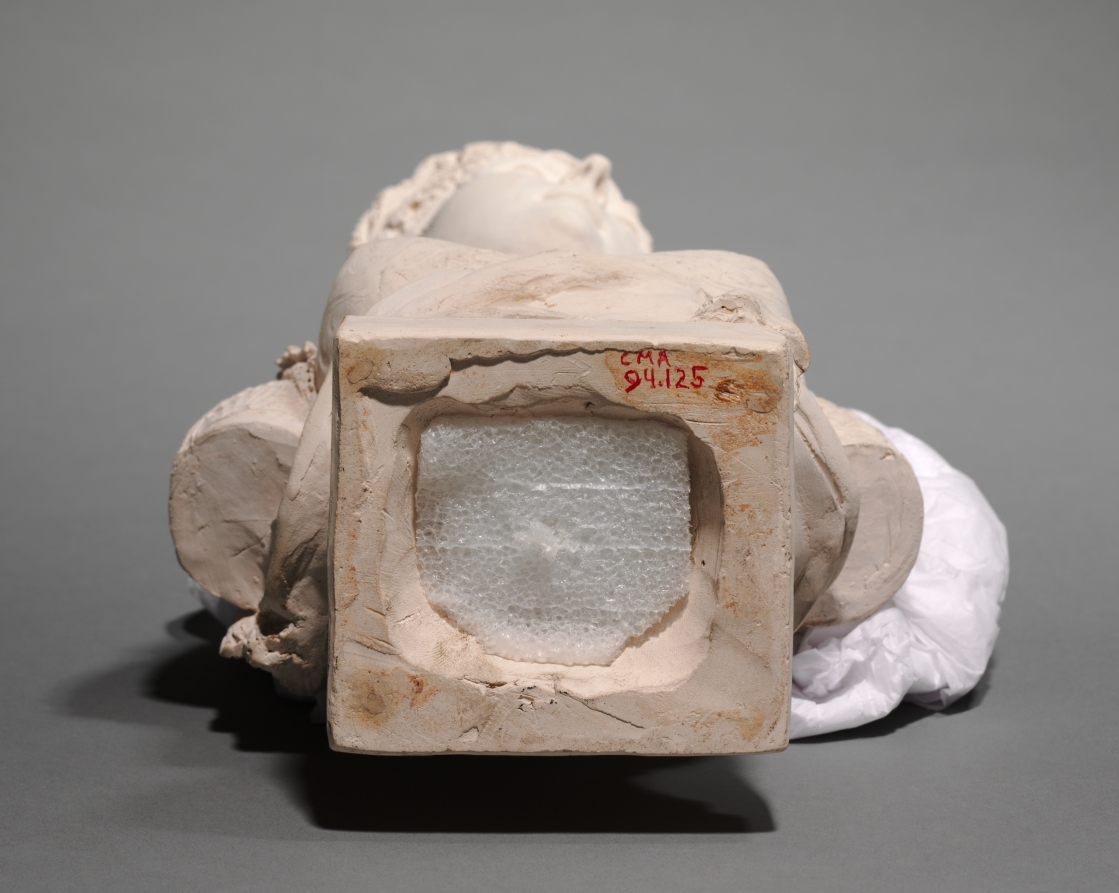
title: Bust of Empress Josephine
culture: France, 19th century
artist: Joseph Chinard (French, 1756–1825)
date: 1805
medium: terracotta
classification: Sculpture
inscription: inscribed on front of base in ligature: "chinard a milan"; inscribed on back of base in ligature: "chinard/de/l'institut m(al?)/membre de plusiere [sp]/ academies/milan-an l (3?)"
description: This bust of the Empress Josephine was sculpted in Milan in 1805 when she accompanied Napoleon to that city for his coronation as the King of Italy.